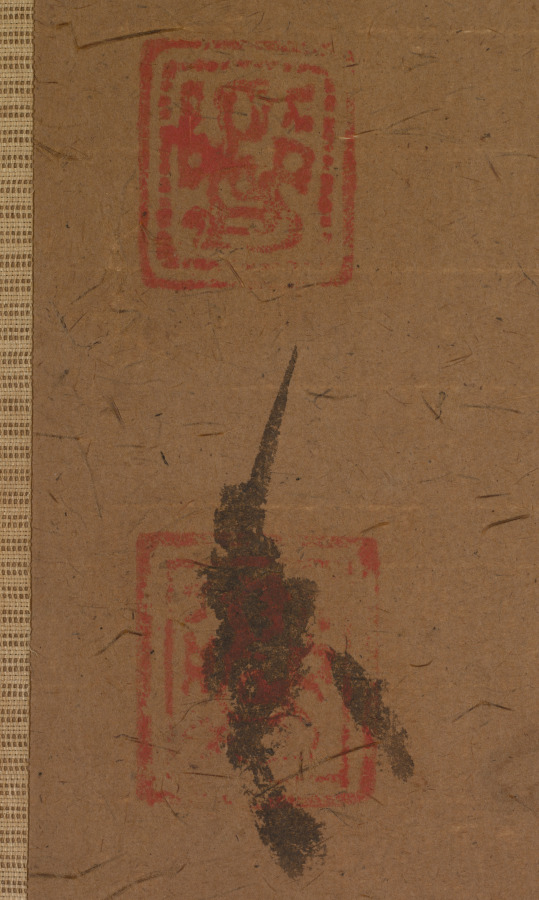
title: Tenjin Traveling to China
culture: Japan, Momoyama period (1573–1615)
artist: Konoe Nobutada (Japanese, 1565–1614)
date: 1610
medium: hanging scroll; ink on paper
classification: Painting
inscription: signed: Nobutada's cipher signature kao inscribed: two poems above, dated Keicho 15